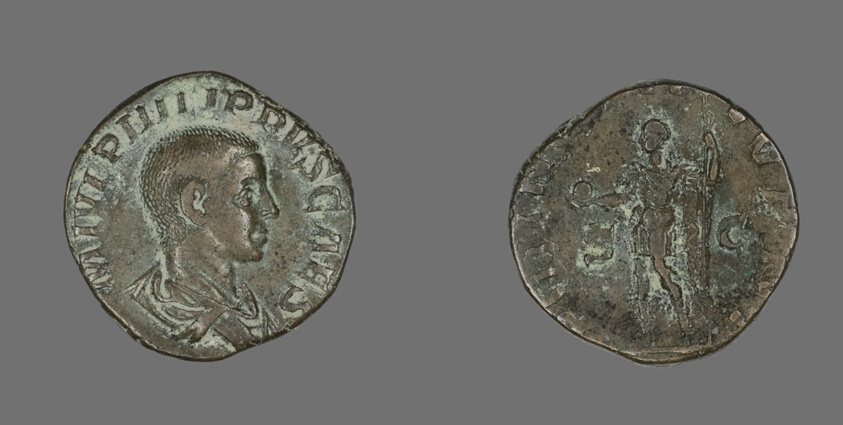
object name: Coin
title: Sestertius (Coin) Portraying King Philip II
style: roman (ancient, style or period)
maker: Roman, minted in Rome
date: 244-246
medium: Bronze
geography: Roman Empire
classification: coin; ancient art